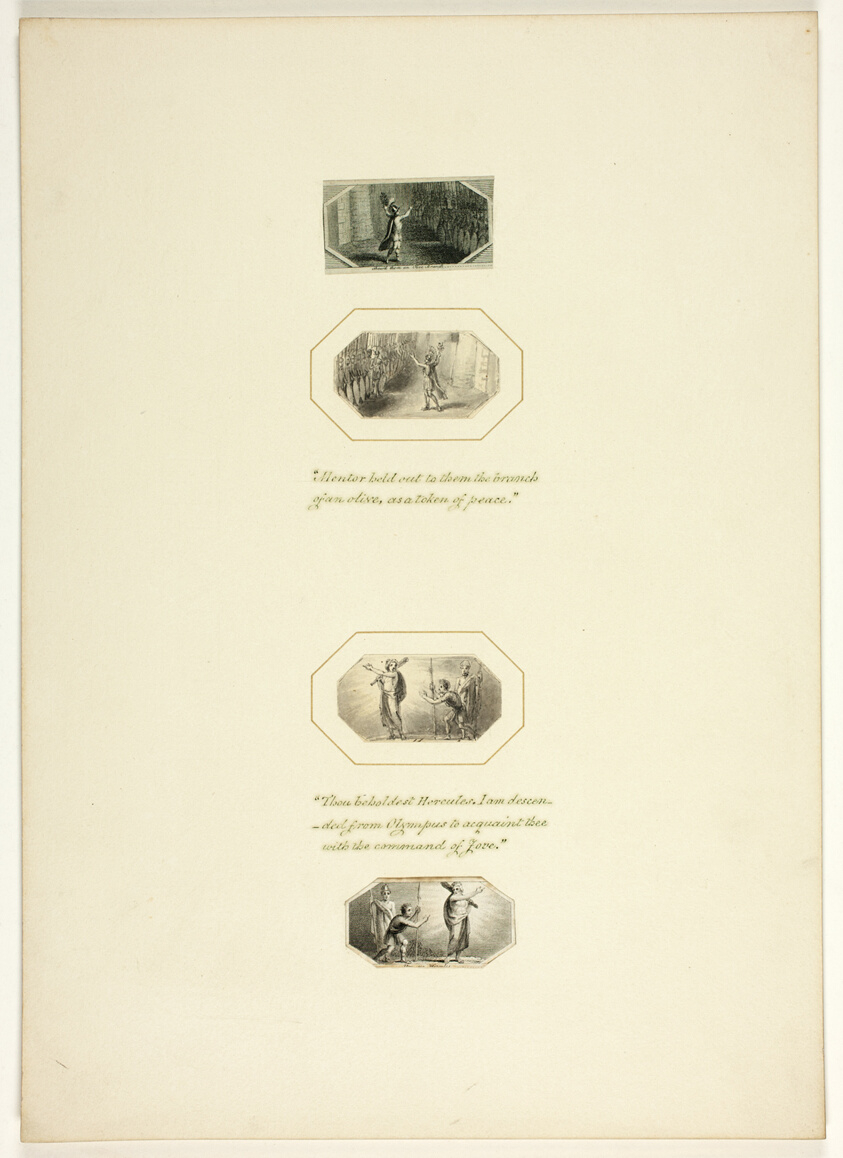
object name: Drawing and Watercolor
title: Study for a plate from Telemachus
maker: Thomas Stothard (English, 1755-1834)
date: c. 1797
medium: Ink wash on paper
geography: England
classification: ink or chalk wash; drawings (visual works); prints and drawing